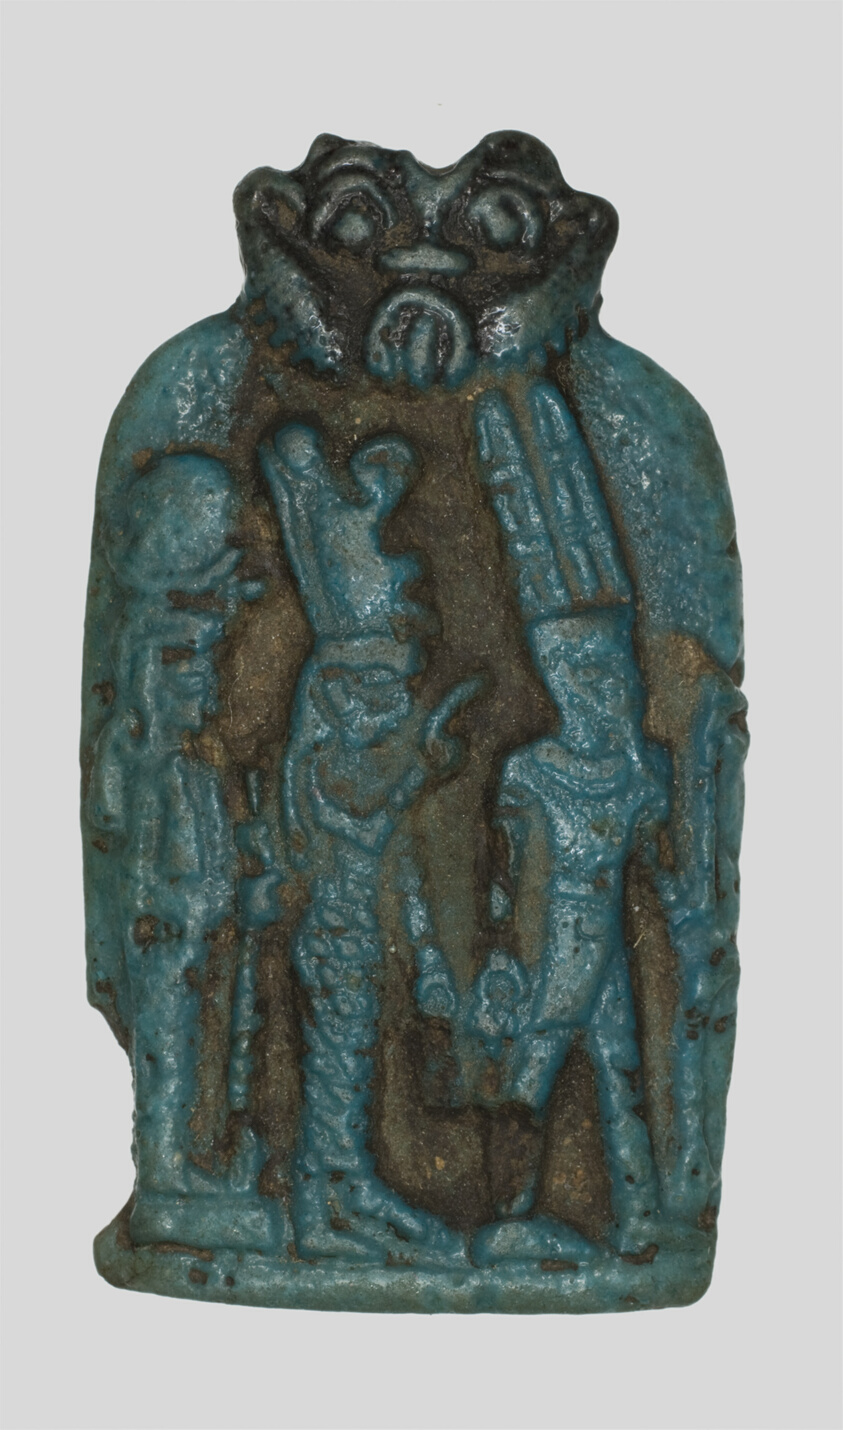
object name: Costume and Accessories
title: Amulet of the Theban Triad, Amun, Mut, and Khonsu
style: egyptian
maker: Egyptian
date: Late Period, Dynasty 26–31 (664–332 BCE)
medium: Faience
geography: Egypt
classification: amulet; jewelry; ceramics; ancient art; costume; faïence (composite material)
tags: gods (deities)